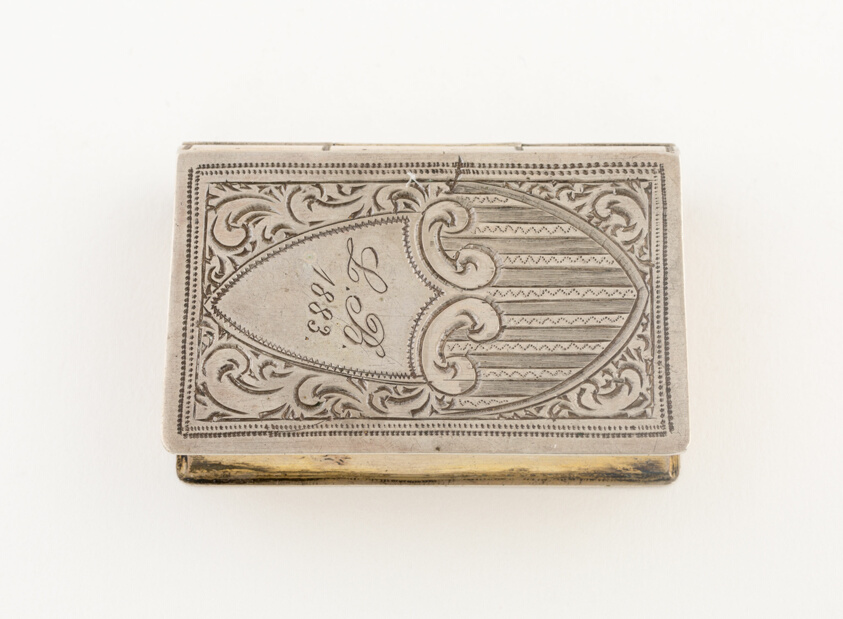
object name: Metalwork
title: Vinaigrette in the Form of a Book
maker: Possibly United States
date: 1883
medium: Silver and silver gilt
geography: United States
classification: container for personal use; vinaigrette (container for health care); european decorative arts; metalwork; silver; decorative object/ornament